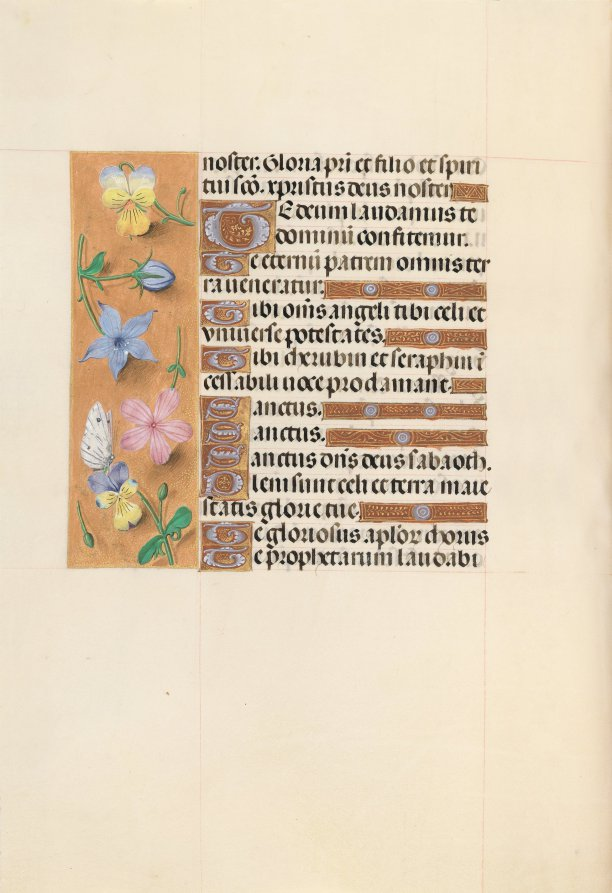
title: Hours of Queen Isabella the Catholic, Queen of Spain: Fol. 112v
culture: Flanders, Ghent and Bruges, late 15th century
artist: Master of the First Prayerbook of Maximillian (Flemish, c. 1444–1519)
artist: and Associates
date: c. 1500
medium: ink, tempera, and gold on vellum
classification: Bound Volume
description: This manuscript was illuminated by a circle of at least five highly organized manuscript painters active in the Flemish cities of Ghent and Bruges. The principal illuminator was Alexander Bening, who painted the majority of the book's miniatures. Manuscripts produced by this circle of artists are renowned for the decoration of their borders, which typically feature a rich variety of realistically-painted flowers, birds, and butterflies. This prayer book, called a book of hours, was intended not for a cleric, but for the private devotions of a lay person-in this case, Isabella the Catholic, Queen of Spain (1451-1504). Isabella's coat of arms embellishes the book's frontispiece. It is unlikely that the book was commissioned by the Queen herself; rather, she probably received it as a diplomatic gift from someone courting her patronage, perhaps Cardinal Francisco Jimenez de Cisneros. A Franciscan friar, Jimenez was dependent upon Isabella for his advancement, first to the post of Queen's confessor in 1492, and then to Archbishop of Toledo in 1495.